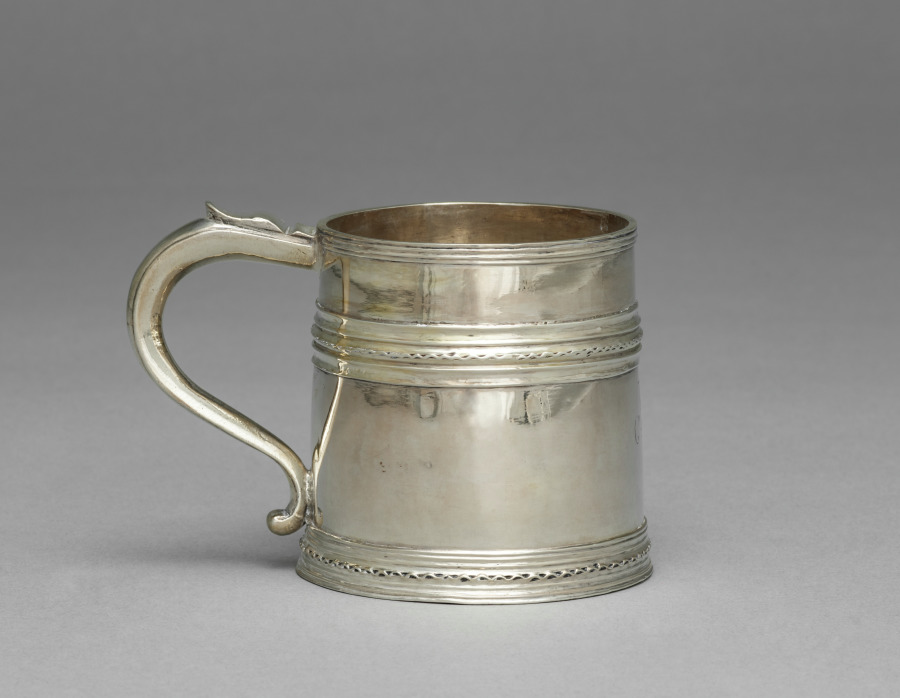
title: Cup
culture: America, New York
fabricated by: Benjamin Wynkoop (American, 1675–1728)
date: 1700–1725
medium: silver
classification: Silver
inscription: engraved: "W" over "C*G" in block letters on front of cup, opposite handle.